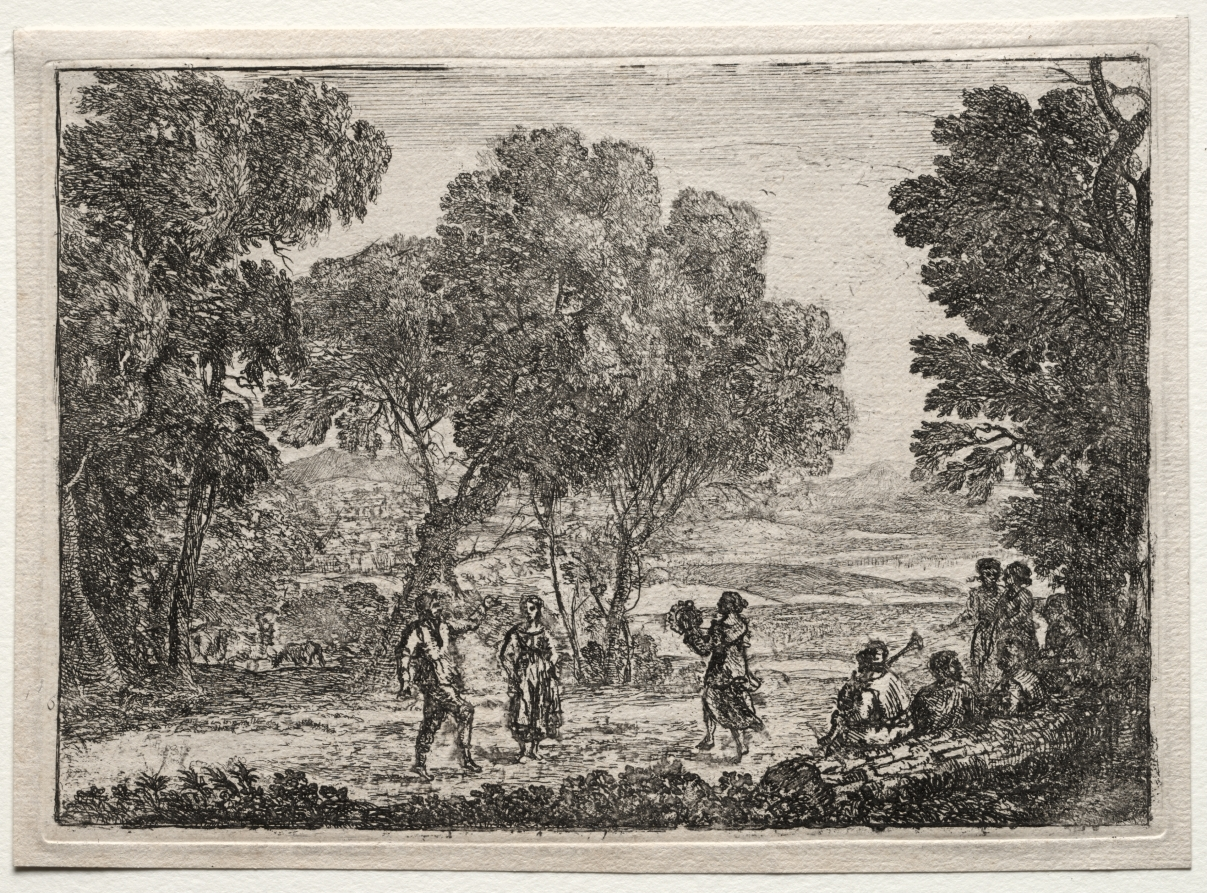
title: Landscape with a Country Dance (Small Plate)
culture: France, 17th century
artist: Claude Lorrain (French, 1604–1682)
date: c. 1637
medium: etching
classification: Print